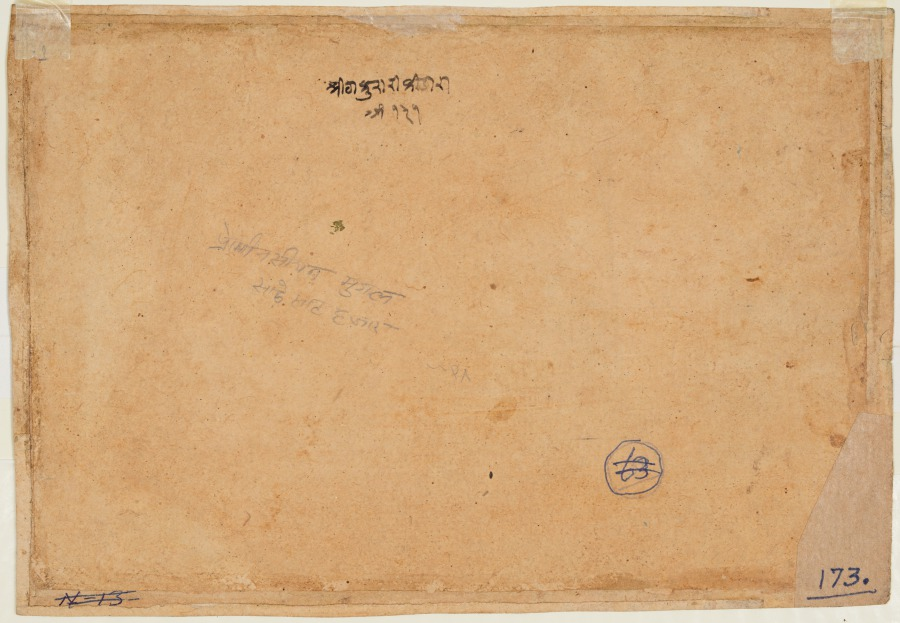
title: Five Poses of Krishna Making Love, from a Bikaner Bhagavata Purana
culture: Northwestern India, Rajasthan, Rajput Kingdom of Bikaner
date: c. 1600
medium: Gum tempera and gold on paper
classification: Painting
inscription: śrī ṭhākurā rī kṛḍā rā a. 131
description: When the Hindu god Vishnu incarnated as his human avatar Krishna, he spent his youth in a cowherd village. When he reached adolescence, the milkmaids were all drawn to him. A passage in the text explains that Krishna miraculously multiplied himself so he could be with each one individually, so they could experience the bliss of divine union.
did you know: Krishna can be seen making love on a swing in the central circle.